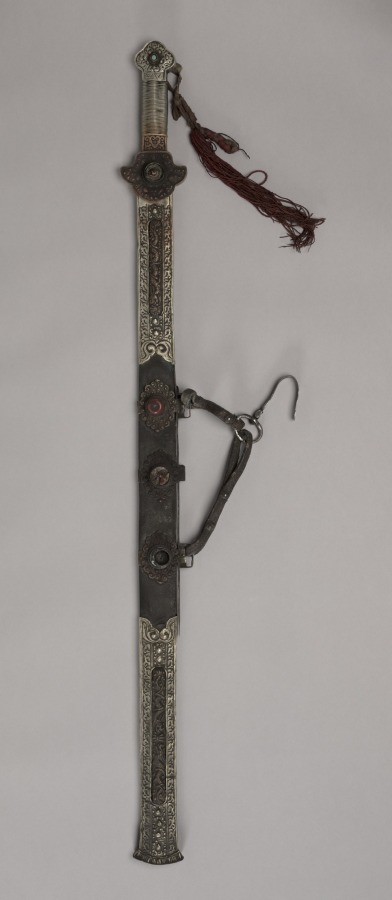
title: Sword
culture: Eastern Tibet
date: 1800s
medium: iron and silver with bone, turquoise, leather and brass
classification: Arms and Armor